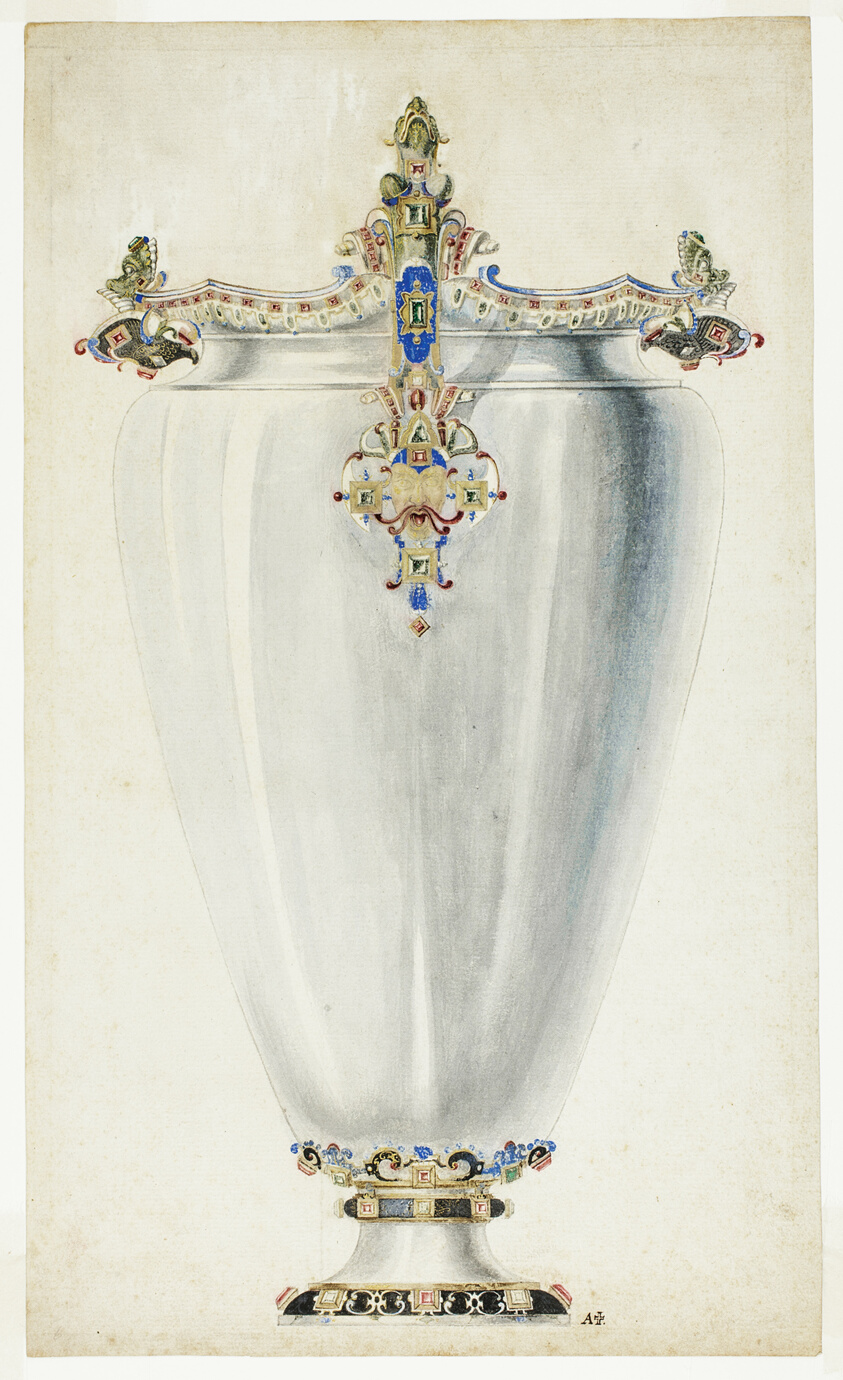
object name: Drawing and Watercolor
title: Monumental Jewelled Vase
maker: Giuseppe Grisoni (Italian, born Flanders, 1699-1769)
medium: Gouache, heightened with touches of gold paint, over black chalk, on ivory laid paper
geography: Italy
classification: gouache; drawings (visual works); prints and drawing